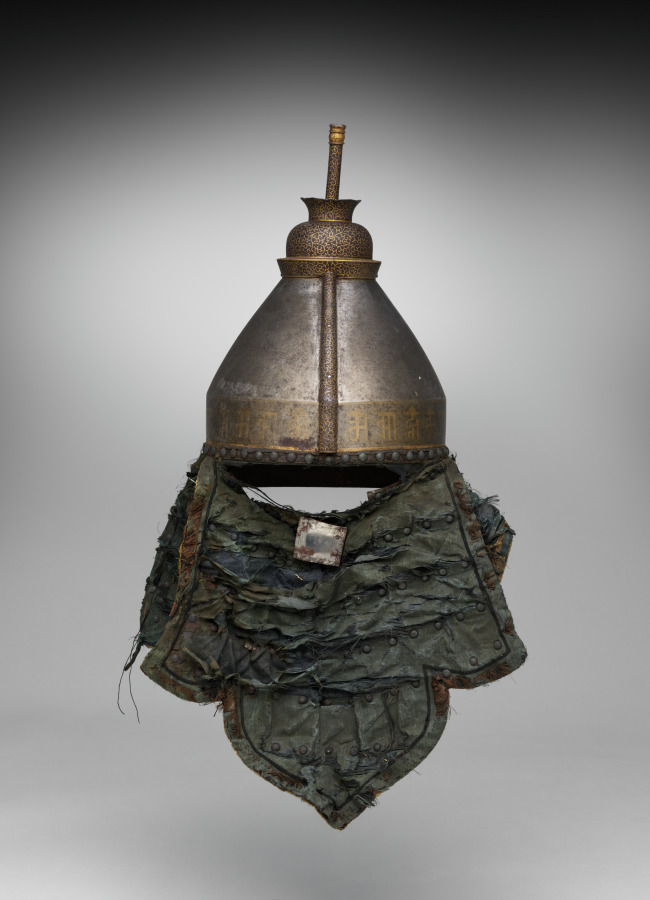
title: Helmet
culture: Sino-Tibetan, Ming dynasty (1368-1644)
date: 1368–1644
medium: iron inlaid with gold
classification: Arms and Armor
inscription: Tibetan inscription